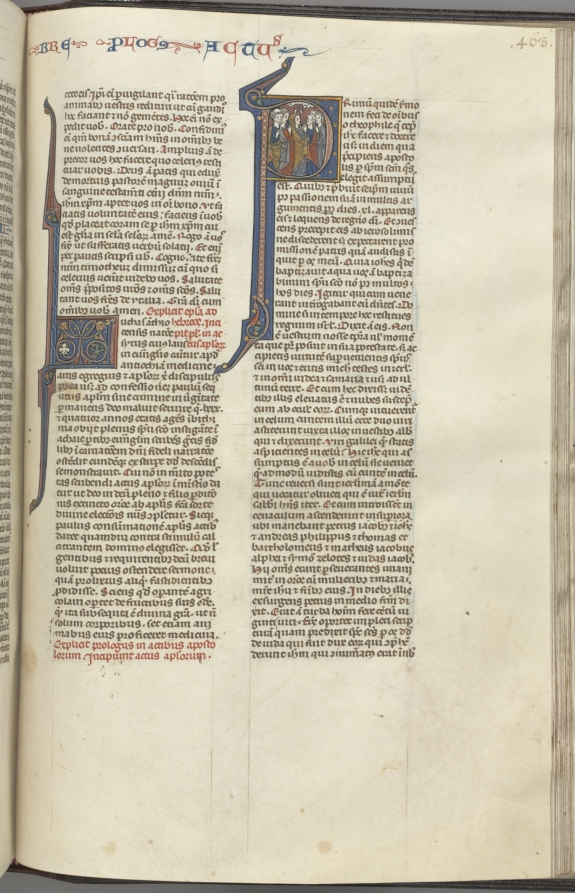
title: 74. Fol. 463r, Acts, historiated initial P, the Ascension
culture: Southern France, Toulouse(?), 13th century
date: c. 1275–1300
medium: ink, tempera and gold on vellum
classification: Bound Volume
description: Biblical manuscripts were highly prized and important possessions of churches, monasteries, cathedral schools, and universities throughout medieval Europe. The biblical texts were known as the vulgate, the translations made by Saint Jerome in the fourth century from Hebrew and Greek into Latin, which became the definitive and official Latin version of the Roman Church. In the 13th century, the bible was, for the first time, produced as a single volume with an officially sanctioned sequence to its books and chapters as illustrated by this example. The very extensive decoration of this bible is arranged hierarchically to indicate the relative importance of the various texts so that full or almost full-page initials mark the openings of the first prologue, Genesis, and the first Gospel; historiated initials mark the beginning of each book and illuminated initials mark the Prologues.